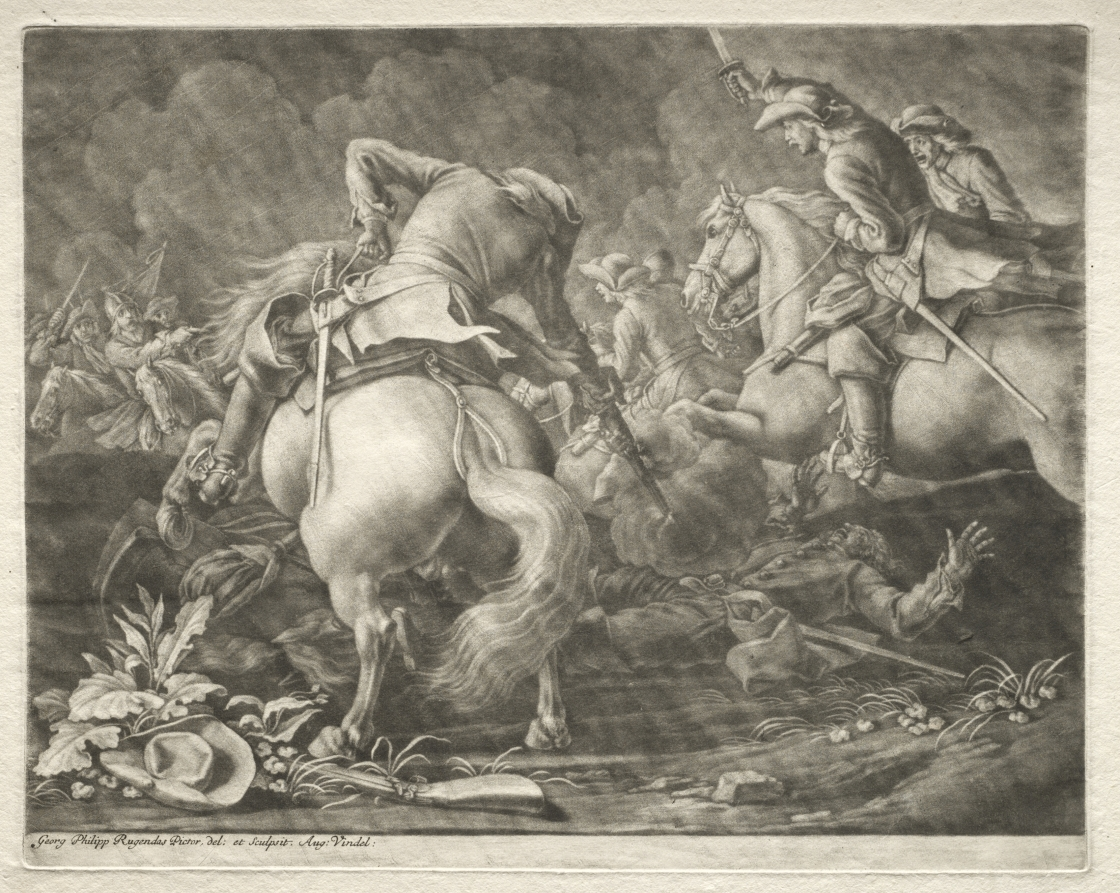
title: Skirmish between Prussian and Hungarian Hussars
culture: Germany, 18th century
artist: Georg Philipp I Rugendas (German, 1666–1742)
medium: mezzotint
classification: Print